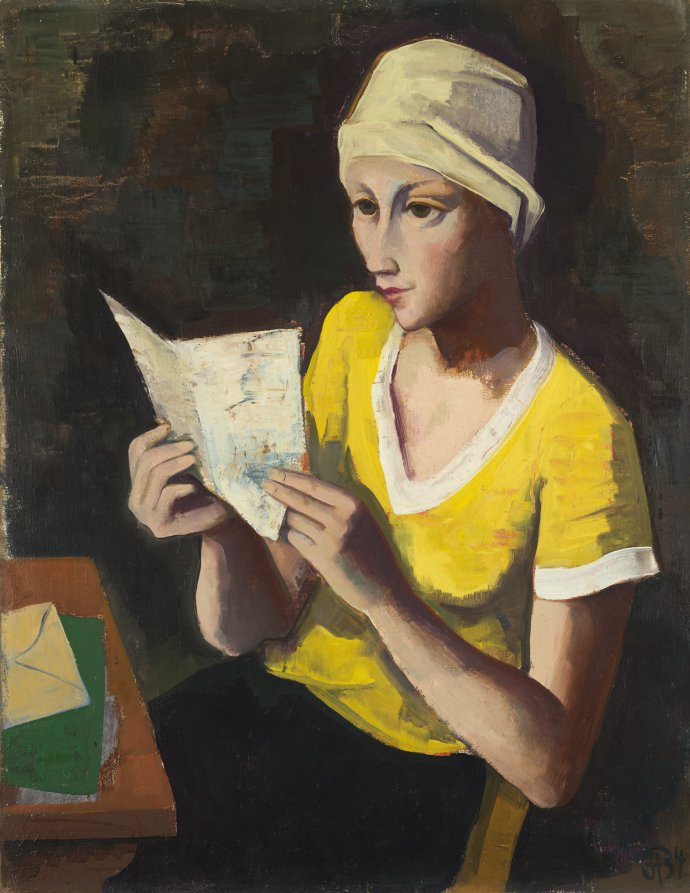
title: The Letter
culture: Germany, 20th century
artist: Karl Hofer (German, 1878–1955)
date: 1934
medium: oil on canvas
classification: Painting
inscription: signed lower right: CH34 [monogram]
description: Hofer's art is filled with disillusionment and pessimism, expressing his dark vision of modern life through a limited range of themes that the artist repeated obsessively. Born in Karlsruhe, Hofer settled in Berlin in 1913. Condemned by the Nazis as a "degenerate artist," in 1933 he was dismissed from his teaching post. In 1943 Hofer's studio and most of his work were destroyed by bombing.